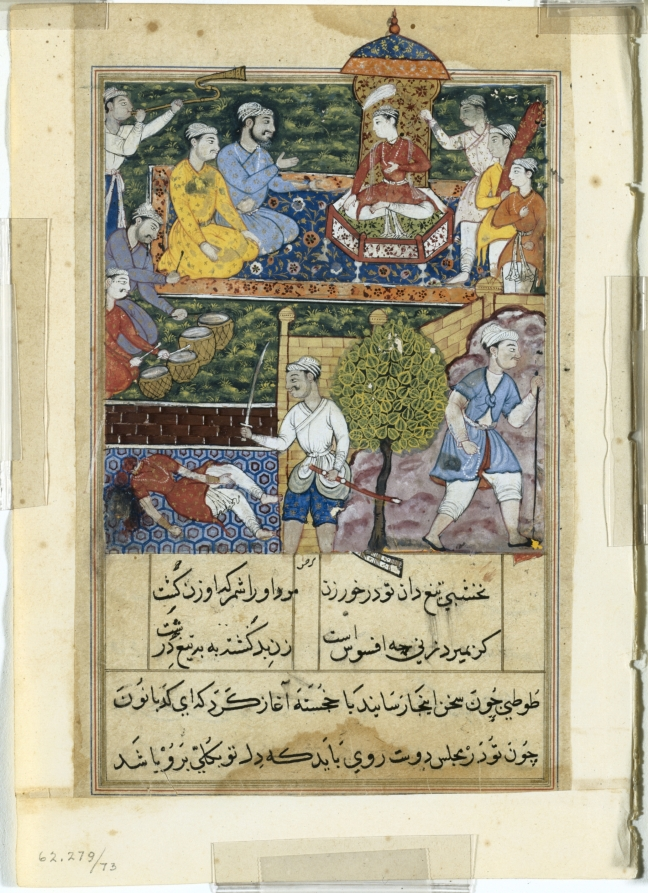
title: The young prince is crowned and the wicked handmaiden is executed, from a Tuti-nama (Tales of a Parrot): Eighth Night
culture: Mughal India, court of Akbar (reigned 1556–1605)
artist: Suraju (Indian)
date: c. 1560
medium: gum tempera, ink, and gold on paper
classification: Painting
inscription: surjū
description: In the concluding illustration to the parrot's story on the eighth night, the prince is enthroned at the top of the composition to the accompaniment of musical fanfare. His father the king, in blue at the lower right, heads off to retirement in the forest, as was customary, with his walking stick and prayer beads. The ends of garments visible below the picture plane reveal that another earlier composition was painted over—a common practice throughout the Tales of a Parrot in which new recruits to the atelier were experimenting with a new style.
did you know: The king, holding a staff and rosary, is leaving to begin life of retirement as an ascetic.